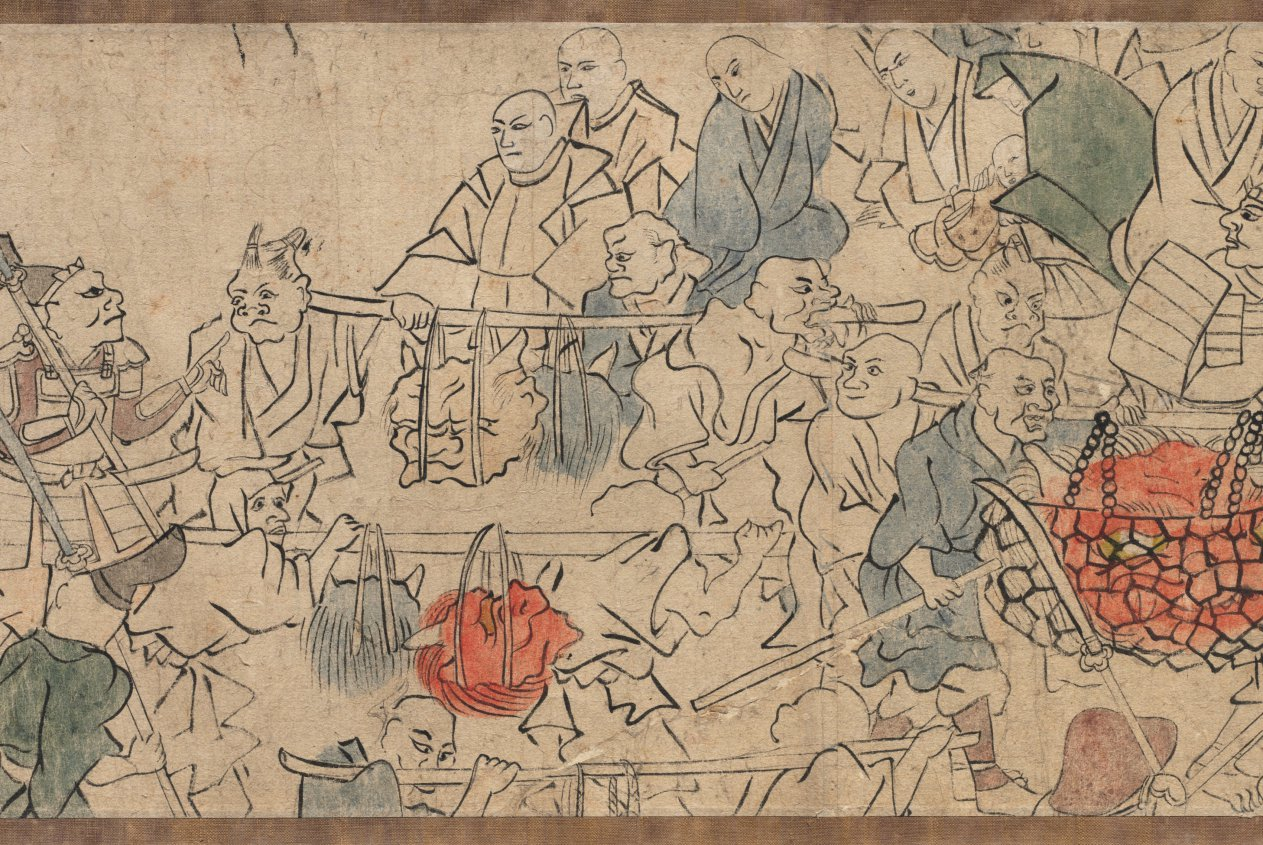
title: Oeyama Engi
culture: Japan, Edo period (1615–1868)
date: 1615–1868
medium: one of a pair of handscrolls; ink and color on paper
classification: Painting